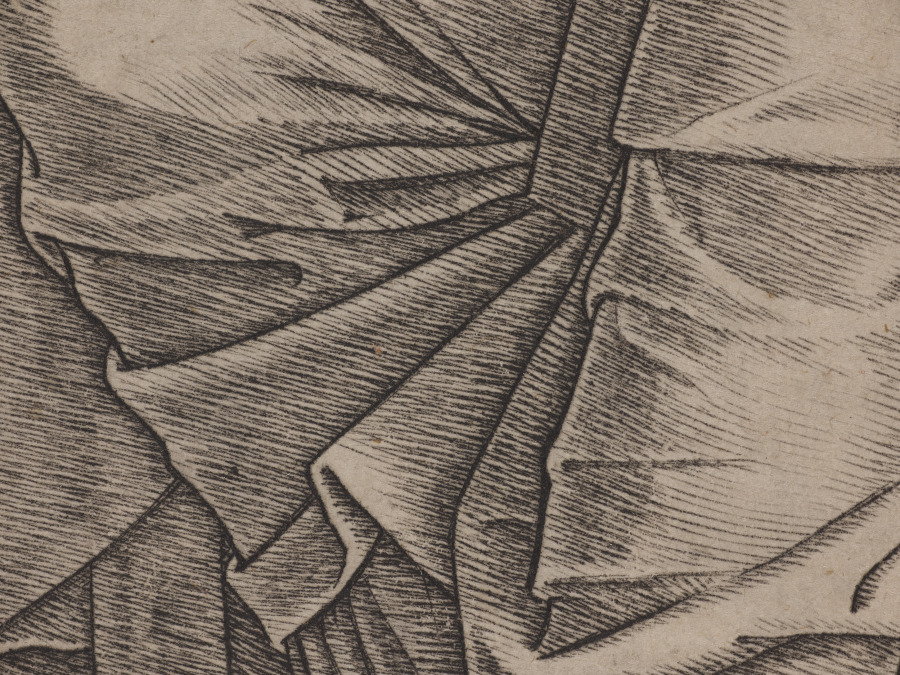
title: Holy Family with St. Elizabeth and the Infant St. John the Baptist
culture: Italy, late 15th-early 16th Century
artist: Giovanni Antonio da Brescia (Italian, about 1460–about 1520)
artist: after Andrea Mantegna (Italian, about 1431–1506)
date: c. 1500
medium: engraving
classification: Print